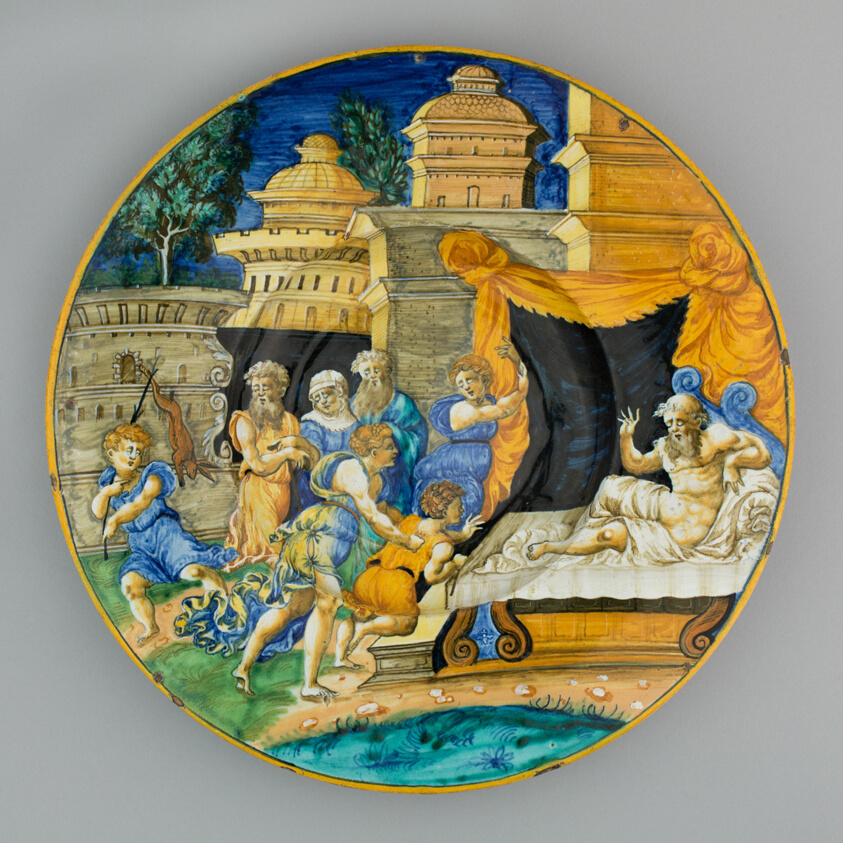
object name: Ceramics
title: Plate with Isaac Blessing Jacob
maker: Workshop of Guido di Merlino; (Italian, active about 1523-64)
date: 1540/1545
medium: Tin-glazed earthenware (maiolica)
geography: Urbino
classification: earthenware; european decorative arts; ceramics; decorative arts